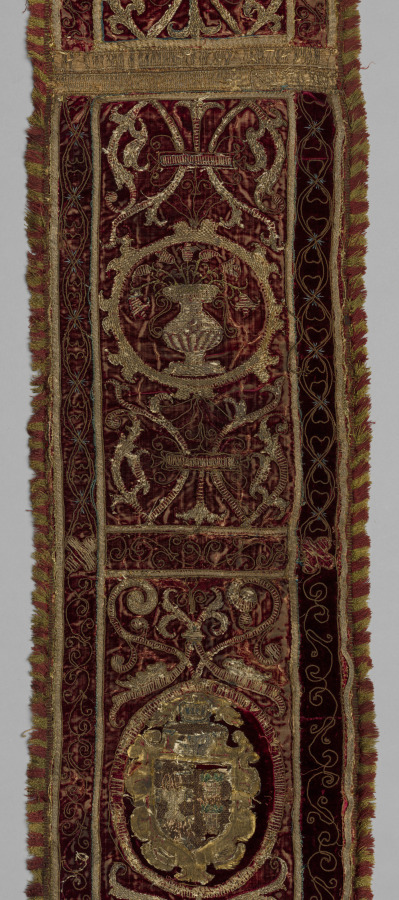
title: Embroidered Strip of Velvet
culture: Spain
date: 1500s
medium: embroidery: silk and gold thread on velvet, fringe border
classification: Velvet